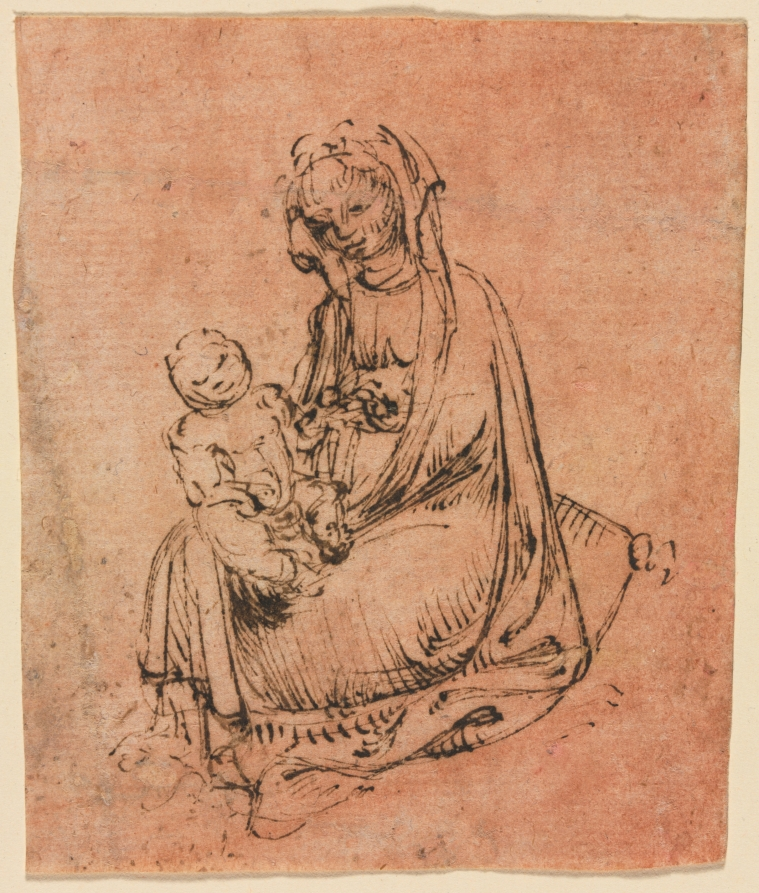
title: Madonna and Child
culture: Italy, Verona, 15th century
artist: follower of Stefano da Zevio (Italian, c. 1374-after 1438)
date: c. 1440/50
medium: pen and brown ink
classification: Drawing